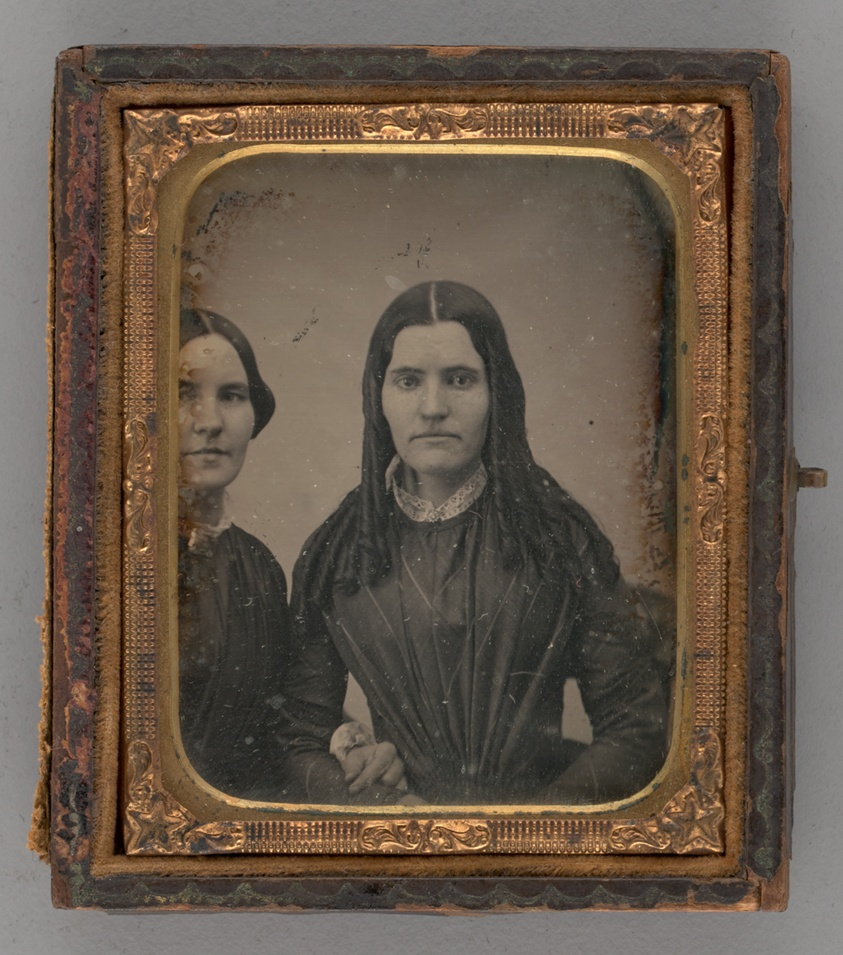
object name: Photograph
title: Untitled (Portrait of Two Women)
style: 19th century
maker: Unknown maker; American, 19th century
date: 1850s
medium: Daguerreotype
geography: United States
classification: portrait; photograph; photographic process; photography; portrait; daguerreotype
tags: lundberg collection, portraits, portraits: female subject, portraits: multiple subjects, portrait, women